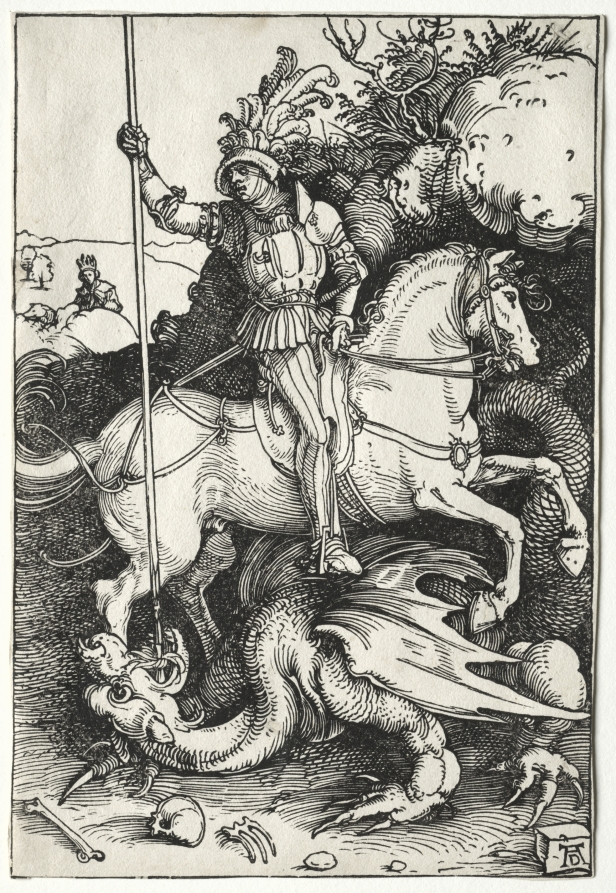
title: St. George Killing the Dragon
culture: Germany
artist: Albrecht Dürer (German, 1471–1528)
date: 1500s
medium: woodcut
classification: Print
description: Saint George’s legend was widespread throughout the Middle Ages. Warrior saints were particularly popular among the knightly class. Here Saint George is depicted as the consummate knight clad in gleaming plate armor as he slays the dragon, a symbol of evil. Such saints are frequently represented demonstrating their martial prowess by killing dragons or demons. For audiences familiar with the chivalric entertainments of their time, stories like those of Saint George held special appeal in representing the triumph of good over evil.